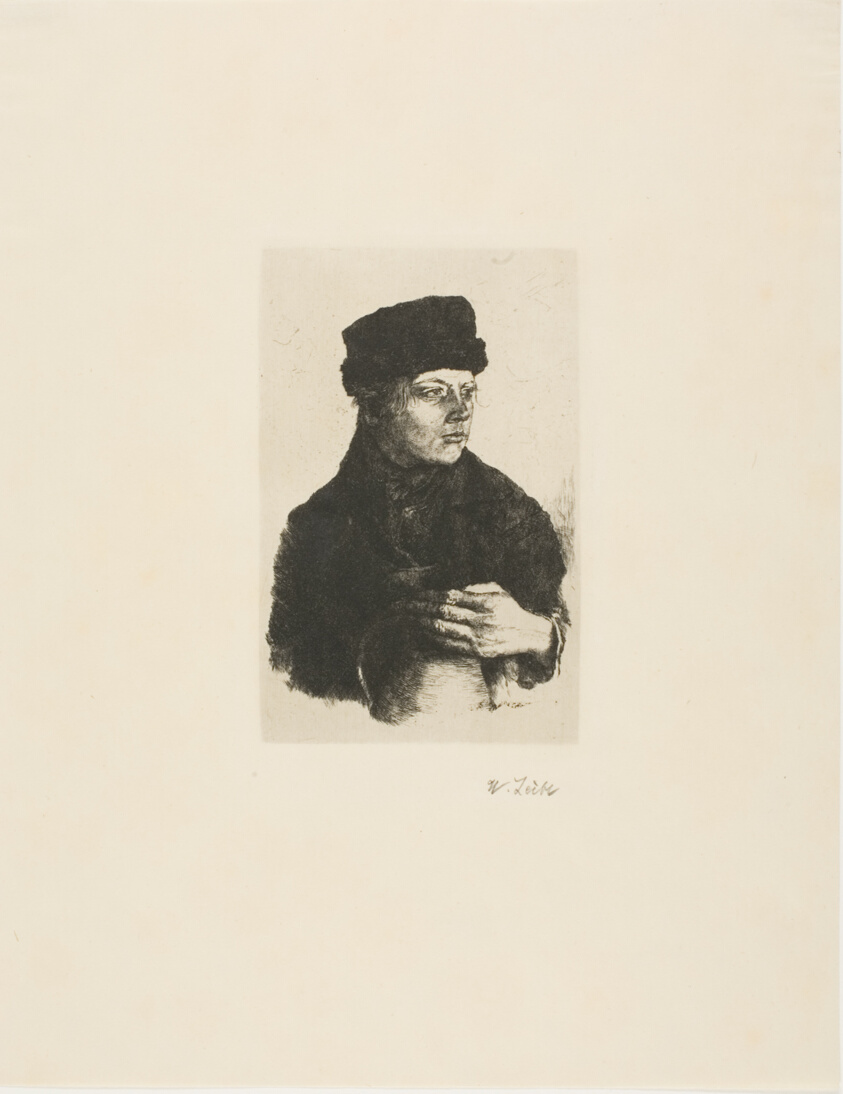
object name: Print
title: Peasant Boy with Jug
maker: Wilhelm Leibl (German, 1844-1900)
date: 1875/77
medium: Etching on cream vellum paper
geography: Germany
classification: etching; print; prints and drawing